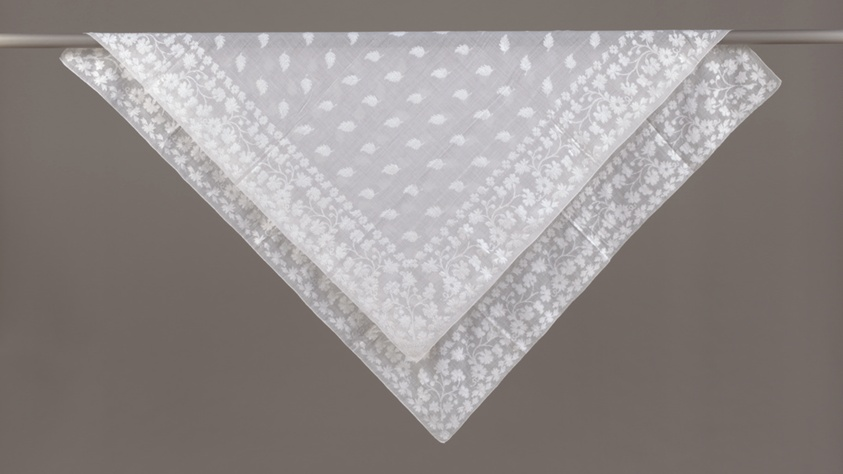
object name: Costume and Accessories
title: Fichu or Scarf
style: 18th Century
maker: Indian, for export to Europe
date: 1750-1800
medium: Cotton; plain weave with supplementary brocading wefts with cut weft turns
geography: India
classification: costume; weaving; textile; costume - weaving; costume accessory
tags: floral motifs, flowers, foliage